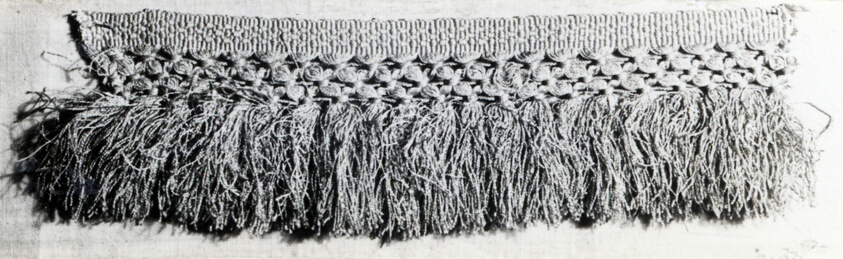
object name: Textile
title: Fringe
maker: Italy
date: 18th century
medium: silk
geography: Italy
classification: textile; weaving